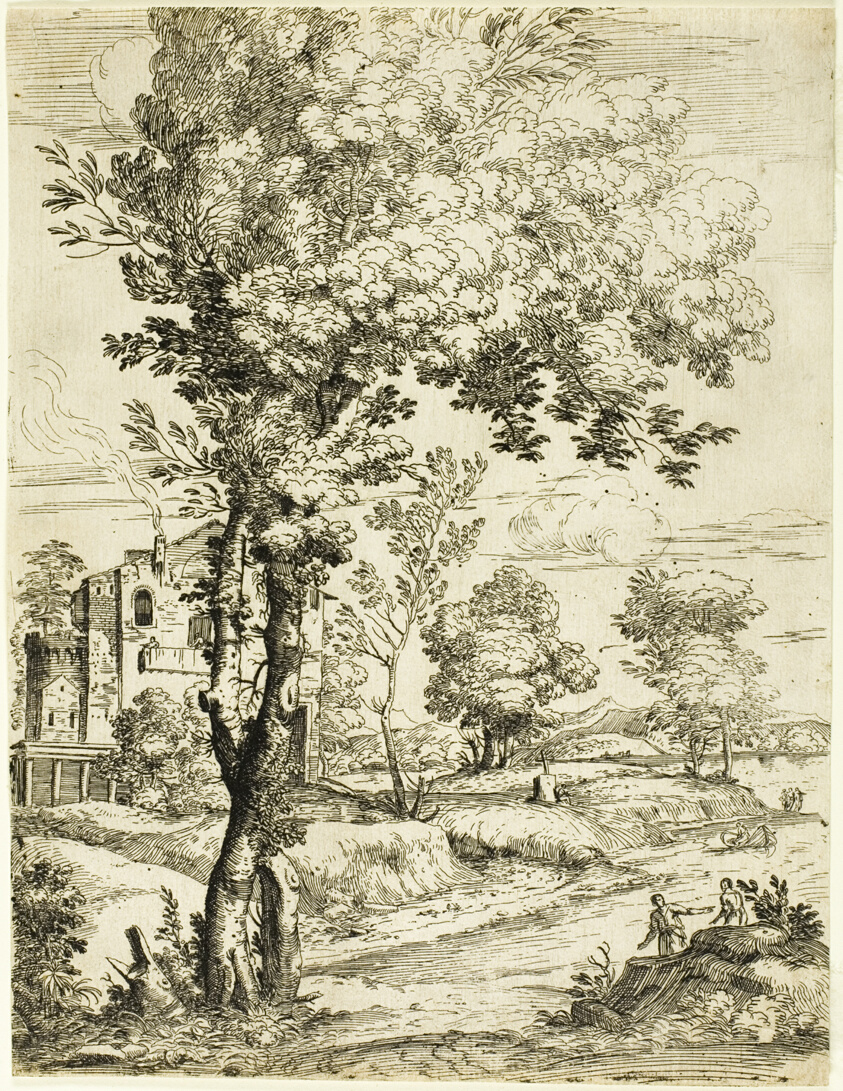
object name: Print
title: Landscape with a House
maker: Giovanni Francesco Grimaldi (Italian, 1606-1680)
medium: Etching on ivory laid paper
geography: Italy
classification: etching; print; prints and drawing